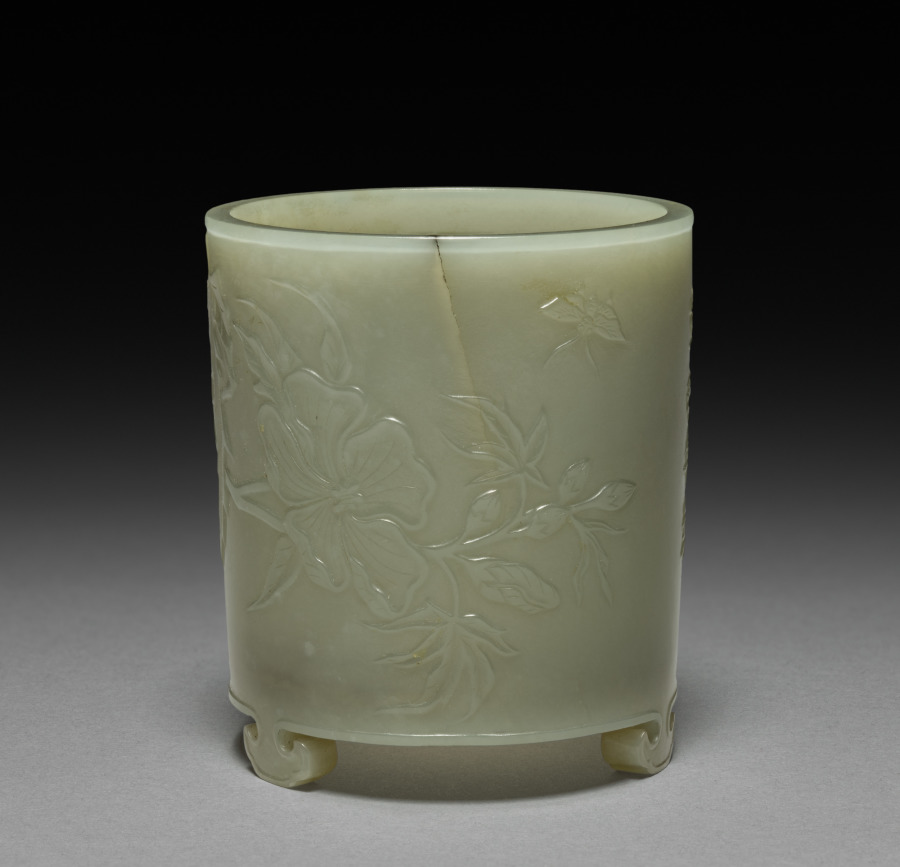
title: Cylindrical Container with Mallows and Inscription in Relief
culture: China, Qing dynasty (1644–1911), Qianlong reign (1736–95)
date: 1736–95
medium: white jade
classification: Jade